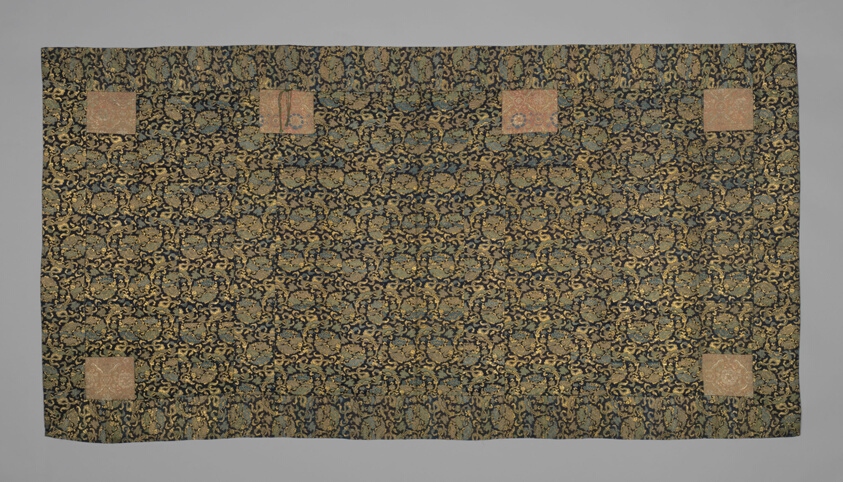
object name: Textile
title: Kesa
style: edo (japanese period)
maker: Japan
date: Edo period (1615–1868), late 18th century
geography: Japan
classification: textile; liturgical - buddhist; costume; weaving